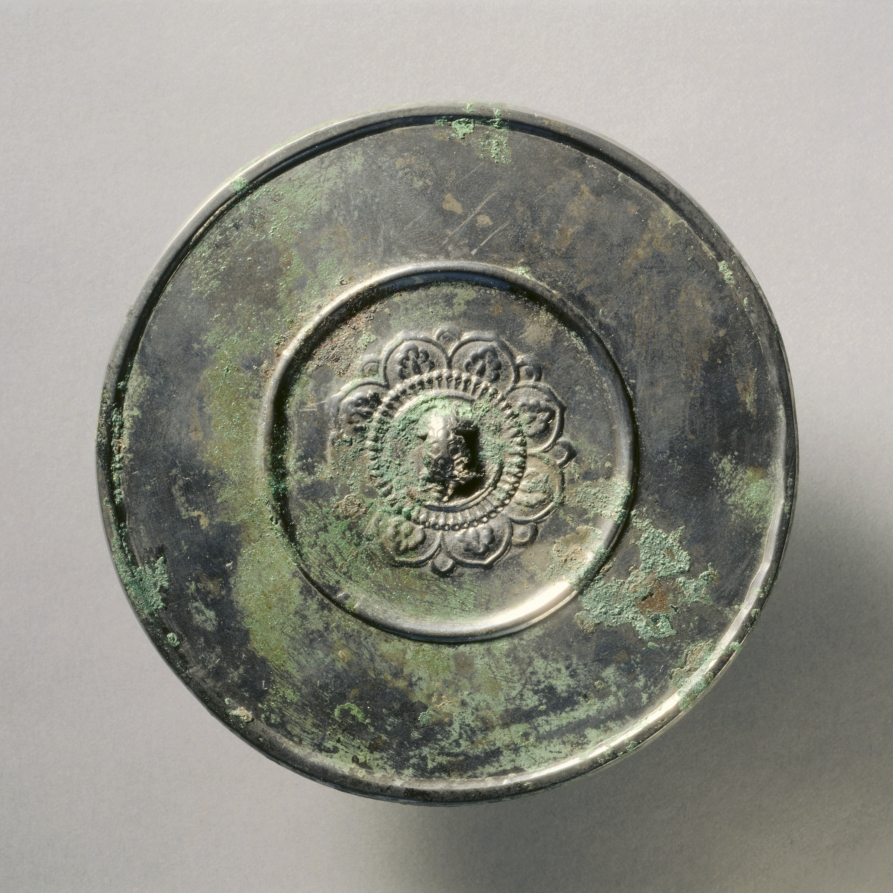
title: Mirror of Tortoise Knob and Lotus Pattern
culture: China, Tang dynasty (618-907)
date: early 600s-early 900s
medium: bronze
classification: Metalwork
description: The mirror retains much unaltered metal. The back of the mirror was highly polished and the reflecting properties of the high tin bronze can be easily observed.